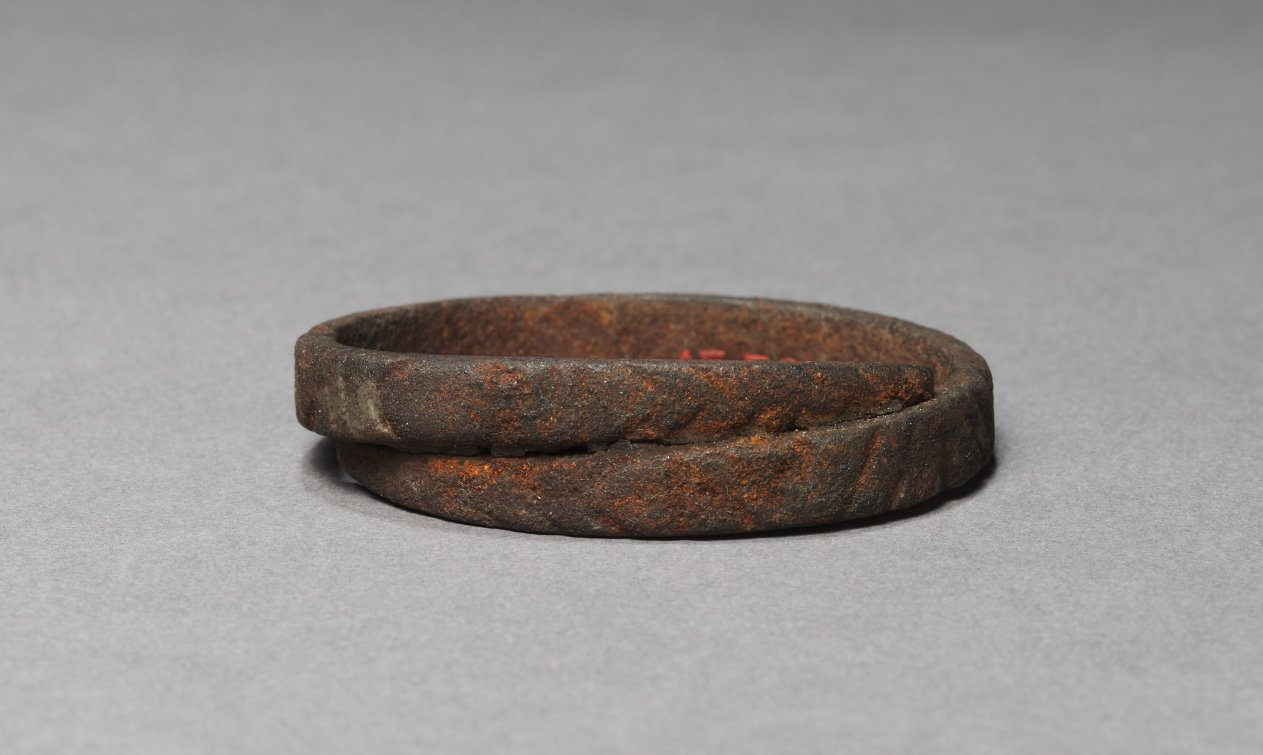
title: Bracelet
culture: Egypt, Greco-Roman period (332 BCE–395 CE), Roman empire (30 BCE–395 CE)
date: 200–400 CE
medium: iron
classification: Jewelry